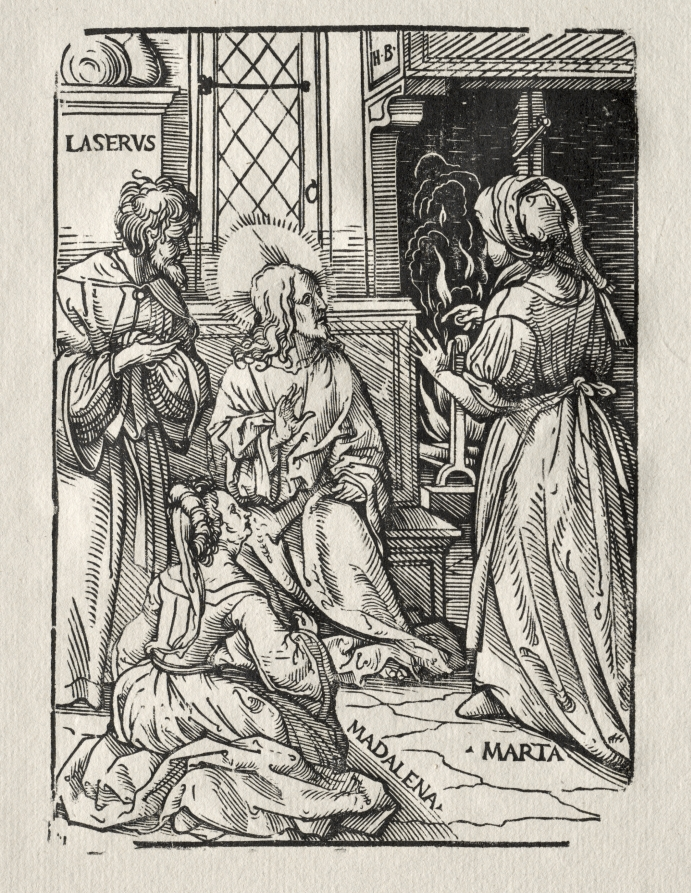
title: Christ in the House of Lazarus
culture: Germany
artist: Hans Burgkmair (German, 1473–1531)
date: 1510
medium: woodcut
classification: Print